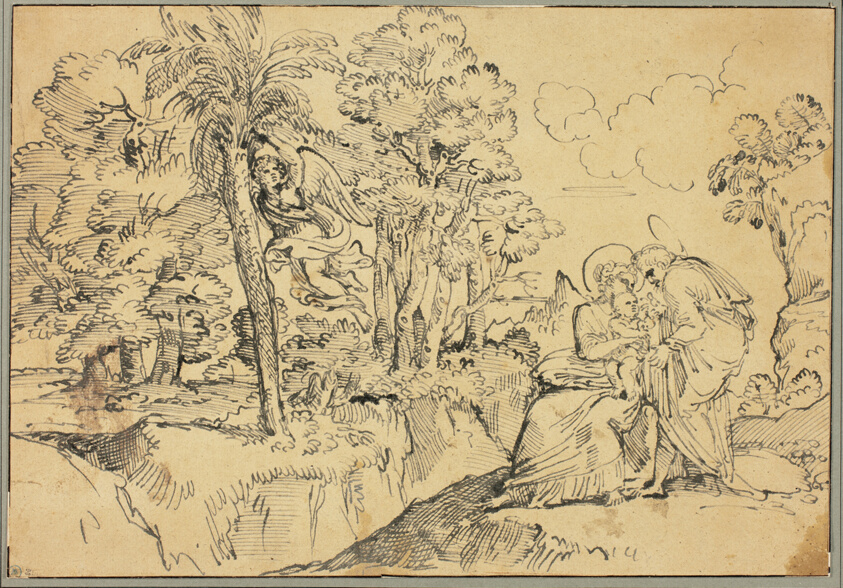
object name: Drawing and Watercolor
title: Rest on the Flight into Egypt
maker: Michel Corneille, the Younger; French, 1642–1708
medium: Pen and black ink, on tan laid paper, laid down on cream laid paper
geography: France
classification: pen and ink drawings; drawings (visual works); prints and drawing